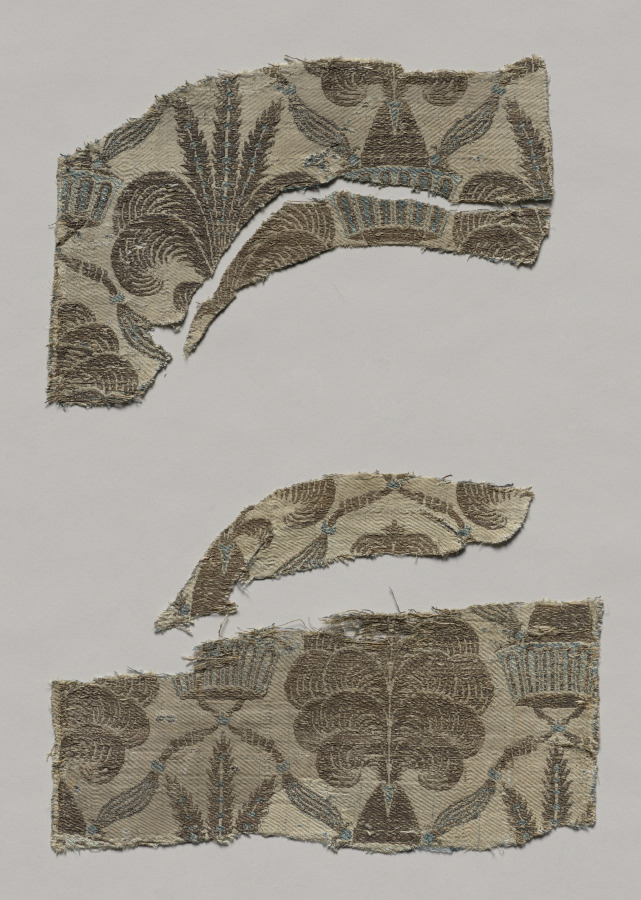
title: Silk Fragments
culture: Italy, last third of the 14th century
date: 1360–1399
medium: lampas weave, silk and gold thread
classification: Textile